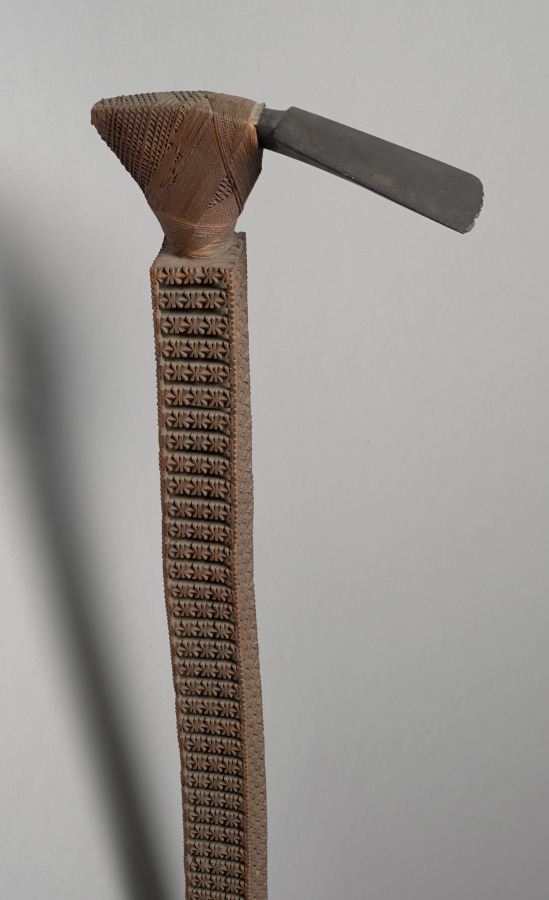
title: Ceremonial Adze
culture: Polynesia, Mangaia, Cook Islands, 19th century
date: 1800s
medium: wood, stone, fiber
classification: Sculpture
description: Before European contact, Polynesian carving tools were fashioned from bone, shell, stone, or teeth. The introduction of iron tools facilitated carving, while the demand of European sailors and missionaries for souvenirs provided a new market for craft products. Ceremonial adzes probably represented gods or spirits. The wooden handle of this example is carved with the characteristic K motif. The stone adze blade is lashed to the handle with finely plaited sennit fiber cord. According to legend, the distinctive pattern formed by the sennit lashing was taught to Mangaian craftsman by the gods.